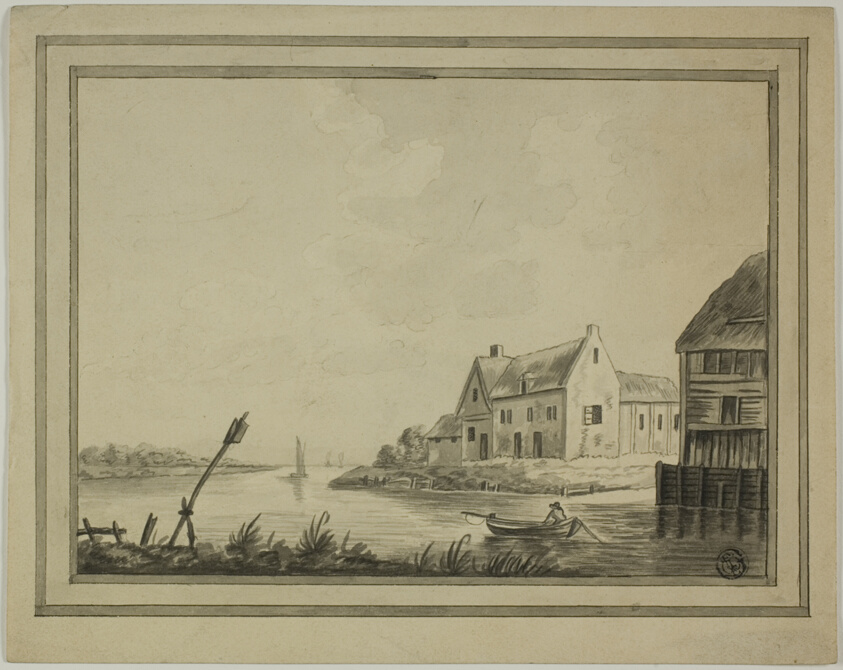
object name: Drawing and Watercolor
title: Houses on River or Canal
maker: Unknown Artist; Dutch, 18th century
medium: Pen and black ink, with brush and gray wash, over graphite, on cream wove paper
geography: Holland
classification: ink or chalk wash; drawings (visual works); prints and drawing